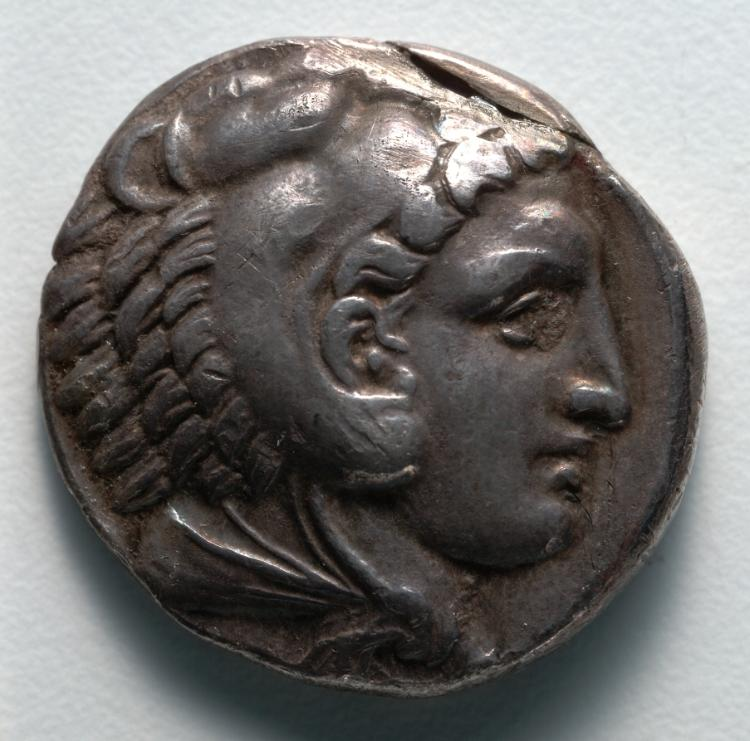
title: Tetradrachm: Head of Young Herakles (obverse)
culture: Greek, Macedonian, minted at Amphipolis (Macedonia), reign of Alexander III [The Great]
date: 336–323 BCE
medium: silver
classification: Coins